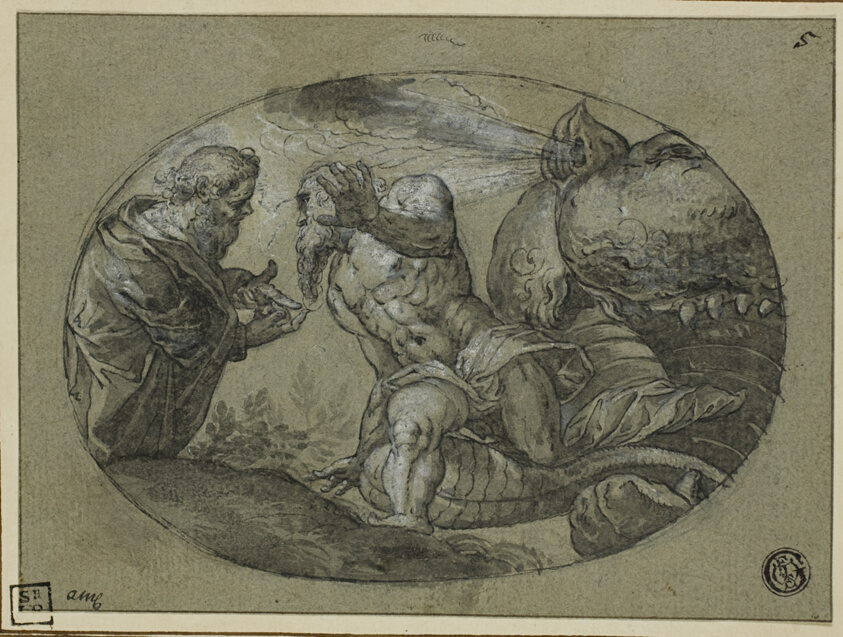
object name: Drawing and Watercolor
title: Jonah Cast Up by the Whale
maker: After Jacopo Robusti, called Tintoretto; Italian, 1519-1594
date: 17th century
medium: Pen and black ink and brush and black and gray wash, heightened with white gouache, on blue laid paper, perimeter mounted on cream laid card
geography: Italy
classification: ink and wash; drawings (visual works); prints and drawing